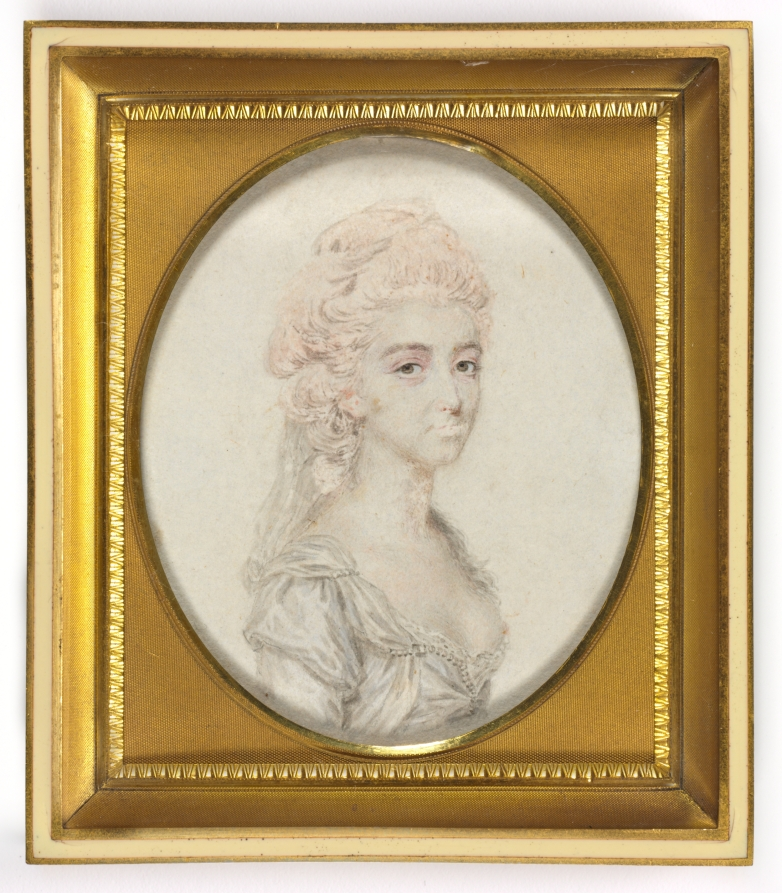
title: Portrait of a Woman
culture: England, 18th century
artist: John I Smart (British, 1741–1811)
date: c. 1776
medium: graphite and wash on laid paper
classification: Portrait Miniature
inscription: inscribed on front of paper at upper right corner: 119 (or 115?); inscribed on paper backing, in graphite, upside down at lower left: 10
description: Although it is impossible to say if it was always part of the artist’s process to execute a preparatory sketch prior to painting each miniature, we do know that John Smart retained many hundreds of these sketches. A group of preparatory sketches—of which this portrait is one—descended through the Smirke family after Smart’s daughter Sarah gave a sketchbook containing preparatory portrait studies to her friend Mary Smirke, sister of the celebrated Victorian architect Sydney Smirke. This book was probably broken up around 1877 when it was divided between Sydney’s daughters Mary Jemmett and Mrs. Lange, whose portions were both sold at auction in 1928. Compared to his contemporaries George Engleheart (1752–1829) and Andrew Plimer (1763–1837), whose female sitters were often painted in similar simple white gowns, Smart often lavished more attention on the costumes in his portraits of women, whose dresses incorporated colored silks, printed fabrics, and luxury trimmings like lace and fur. The sitter’s head and shoulders face left. She has what was probably once blond hair—now faded to pink—dressed high on her head, with curls down the back of her neck, over which a veil descends. Her eyes are hazel, and the color of her lips has almost completely faded. Positioned in an oval, and revealing much of her left breast, she wears a low-necked dress with faint traces of pink pigment, trimmed with a string of pearls. The background is unpainted. To this date, the finished ivory for which this preparatory sketch was presumably undertaken has not been discovered. The portrait was assigned the historically colorful but fictitious title of “Henrietta Maria” at some point after memory of its true identity had been lost. Giving illustrious titles to portraits of unknown sitters was a popular strategy adopted by dealers during the nineteenth and twentieth centuries, often applied to miniature portraits and, in particular, to Smart’s sketches of women. In 1948 Arthur Jaffé wrote to the Cleveland Museum of Art that a “Mrs. Samuelson of Exeter recently brought me two frames, with six sketches mounted in each, of ladies, mostly with fancy names. I think there is no doubt that they were part of Mrs. Lange’s share of the Smirke sketches, though unlike yours they did not pass through Christie’s auction in Dec. 1928. I persuaded Mrs. Samuelson to let me remove them from their frames and to rub the paper backing from the card on which the sketches are painted. The result was as follows. Included was a No. 115 called, Margaret, Archduchess of Austria, which is the same number given to our Henrietta Maria.” Elsewhere Jaffé notes that the number on the front of this sketch was probably a 119 instead of a 115.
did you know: Sketches helped John Smart work out the particulars of a portrait before commencing the miniature on ivory; they were useful in the event that a duplicate might later be required.